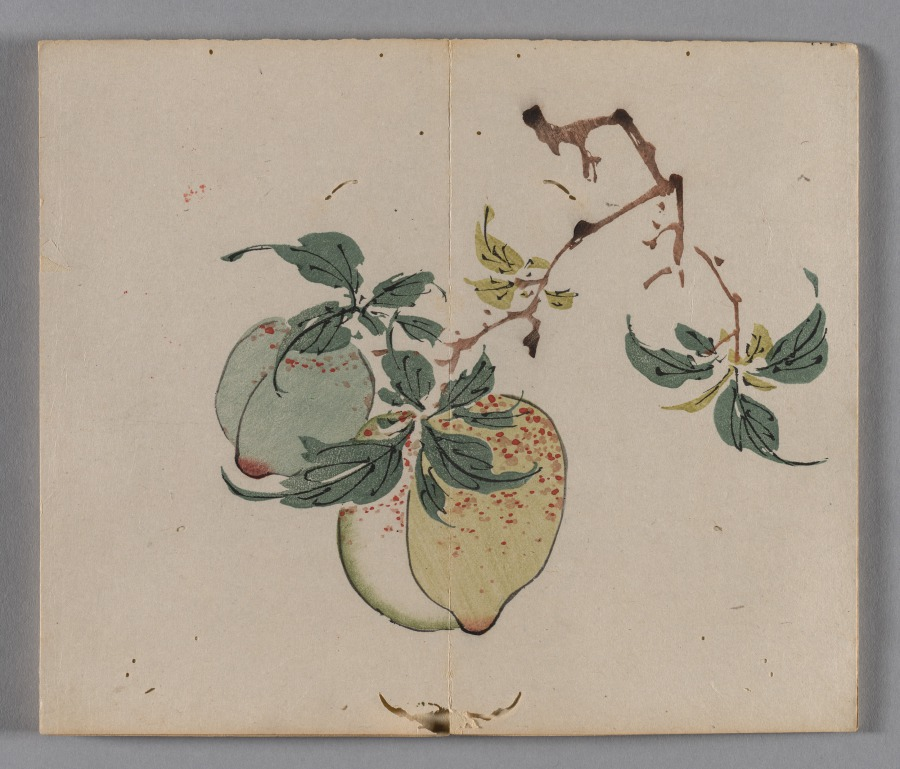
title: Ten Bamboo Studio Painting and Calligraphy Handbook (Shizhuzhai shuhua pu): Fruit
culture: China, Qing dynasty (1644-1911)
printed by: Hu Zhengyan (Chinese, c. 1584–1674)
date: 1633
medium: Woodblock-printed book; ink and colors on paper; first edition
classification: Print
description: Color printing reached a level of perfection in the early 1600s, as seen in this Ten Bamboo Studio Collection of Calligraphy and Painting and the Mustard Seed Garden Manual of Painting (printed 1679 and 1701). The painterly quality, precision in registering (aligning) the woodblocks, and harmonious colors made them the most successful color print editions in Chinese history. Both editions were printed and compiled in Nanjing, spread nationwide, and had a great impact on the arts in Japan and Korea.